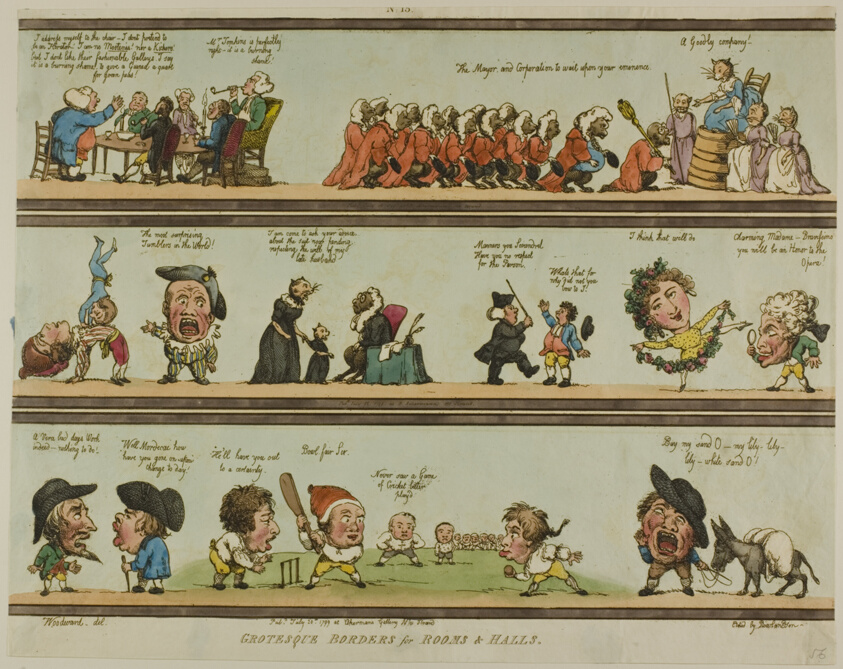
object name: Print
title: Grotesque Borders for Rooms & Halls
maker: Thomas Rowlandson (English, 1756-1827); after George Moutard Woodward (English, c. 1760- 1809); published by Rudolph Ackermann (English, born Germany, 1764-1834)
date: published July 1799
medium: Etching in black, with hand-colored additions, on cream wove paper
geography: England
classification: etching; print; prints and drawing